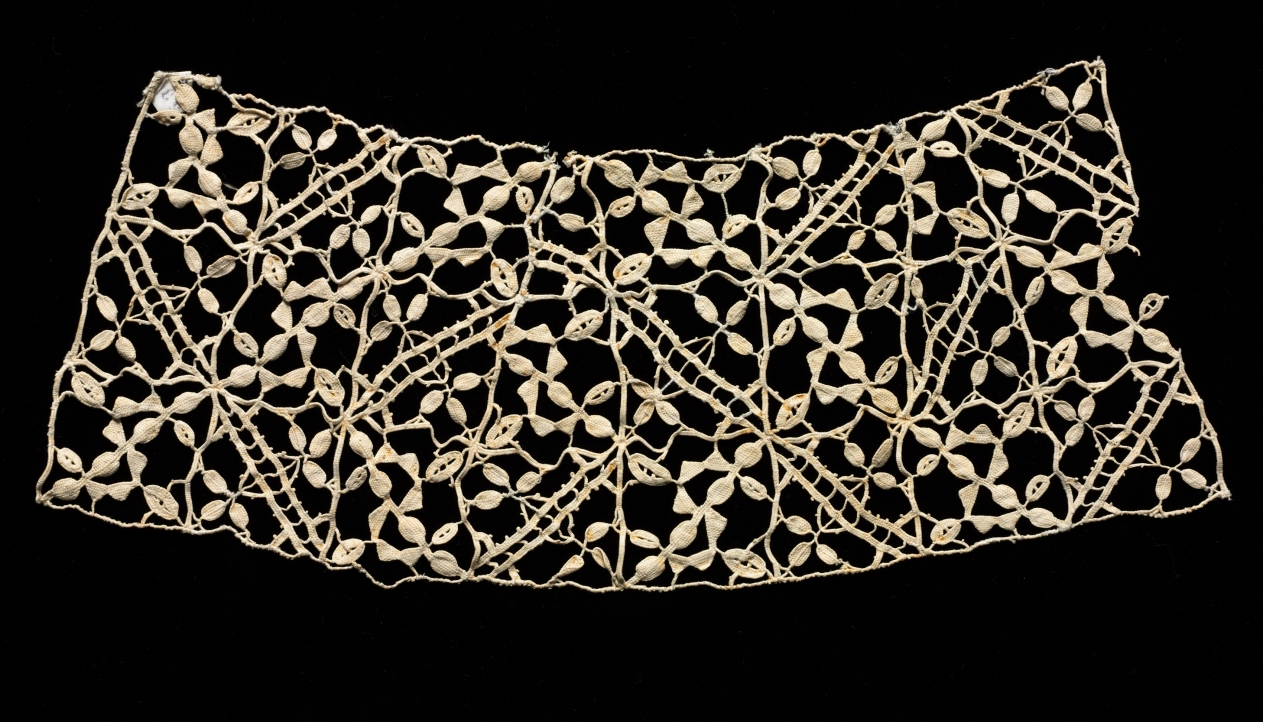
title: Lace Collar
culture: Italy, Genoa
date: 1560–99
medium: Needle lace (Punto in aria)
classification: Lace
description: This Punto in aria collar is based on a Reticella design.